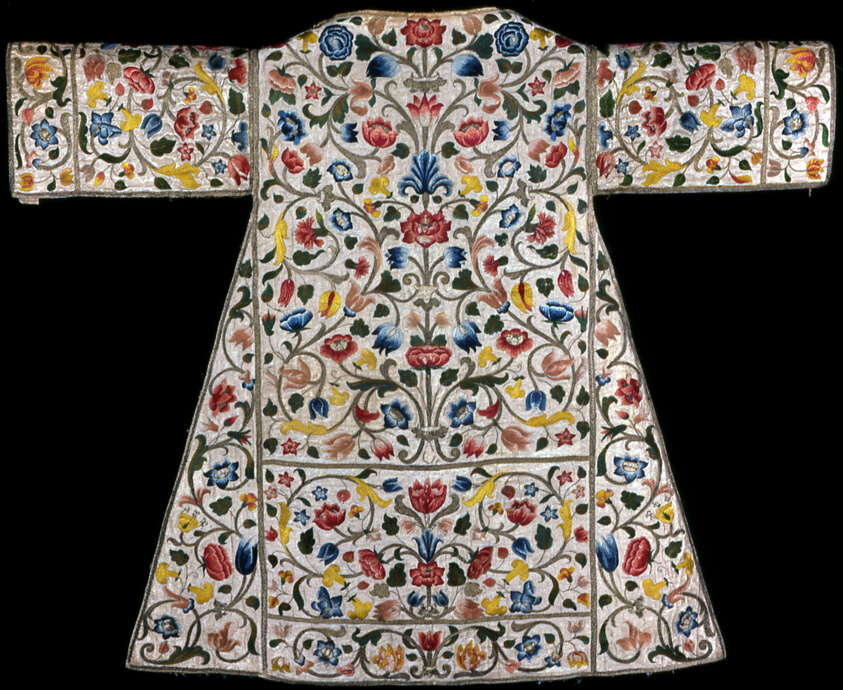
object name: Textile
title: Dalmatic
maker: Italy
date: 18th century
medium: Silk, weft-ribbed plain weave with silvered-metal strip supplementary facing wefts; underlaid with linen, plain weave; embroidered with silk, gilt-metal-strip-wrapped silk, gilt-metal purl, and gilt-metal strips in split stitches; couching and padded couching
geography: Italy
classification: textile; needlework (visual works); dalmatic; costume; liturgical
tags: flowers, yellow (color), white (color), scrolls (motifs), red (color), pink (color), foliage, blue (color)